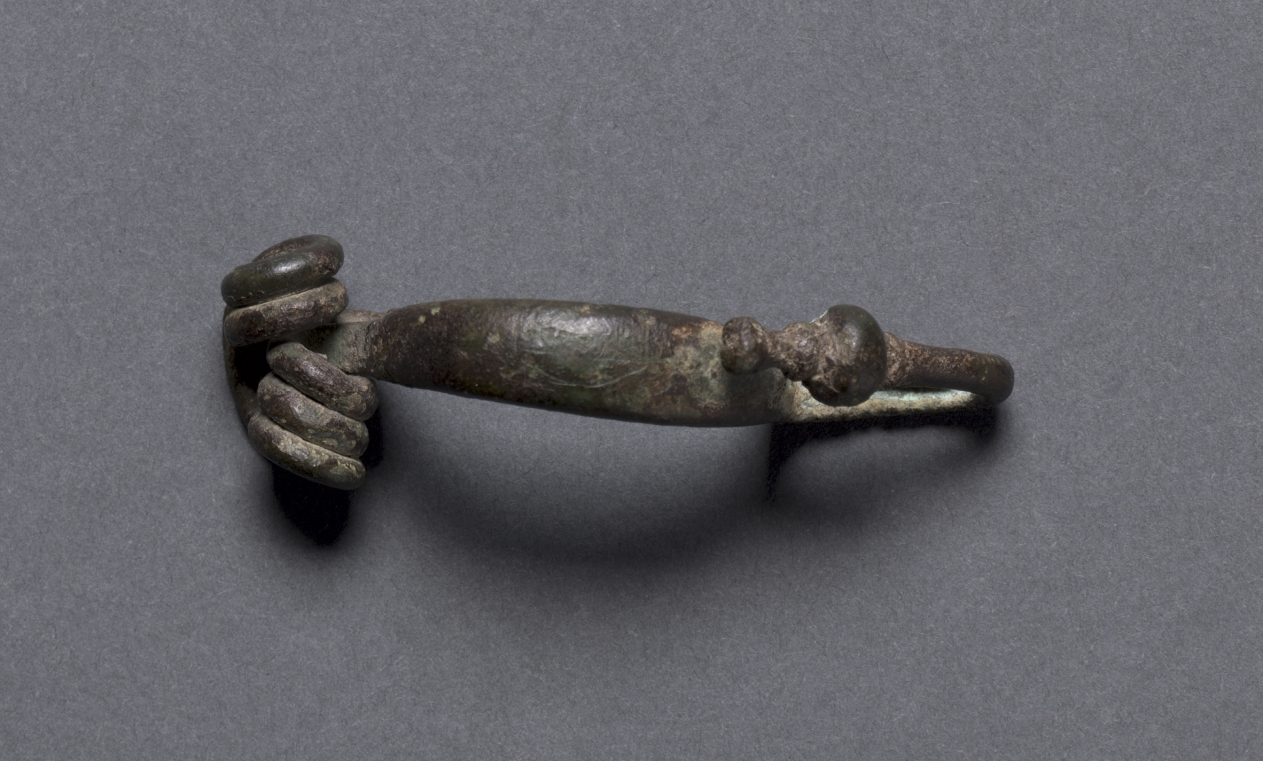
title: Celtic Type Fibula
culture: Classical, Poland (?)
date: 450–225 BCE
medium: bronze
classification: Jewelry